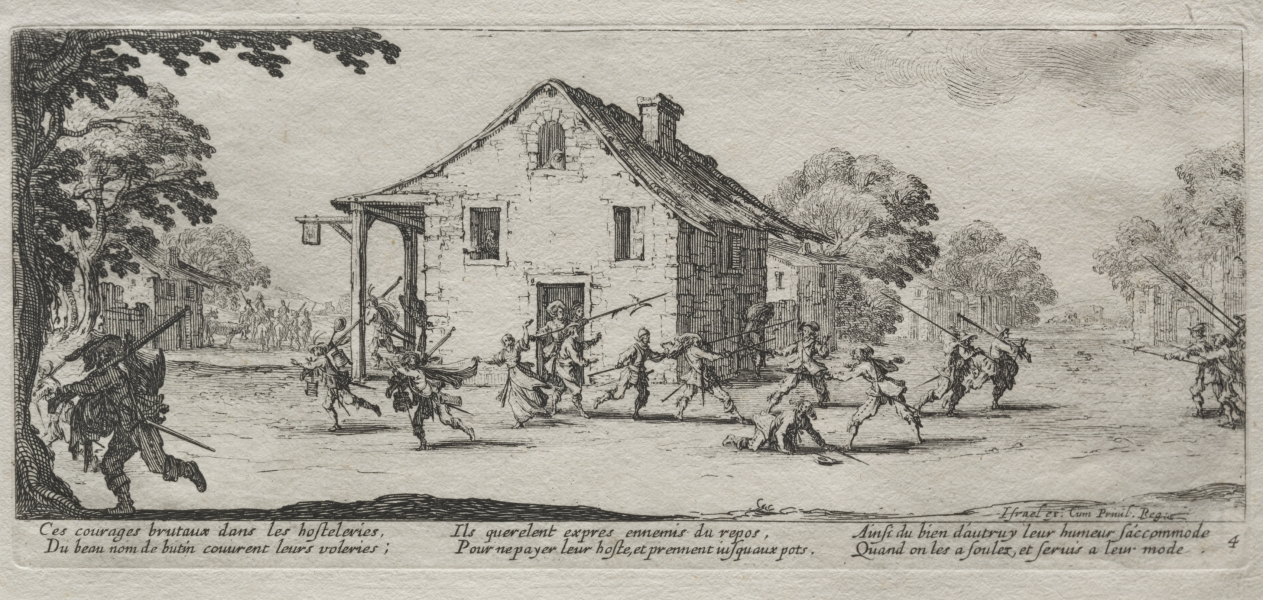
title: The Large Miseries of War: Marauding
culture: France, 17th century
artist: Jacques Callot (French, 1592–1635)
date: 1633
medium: etching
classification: Print